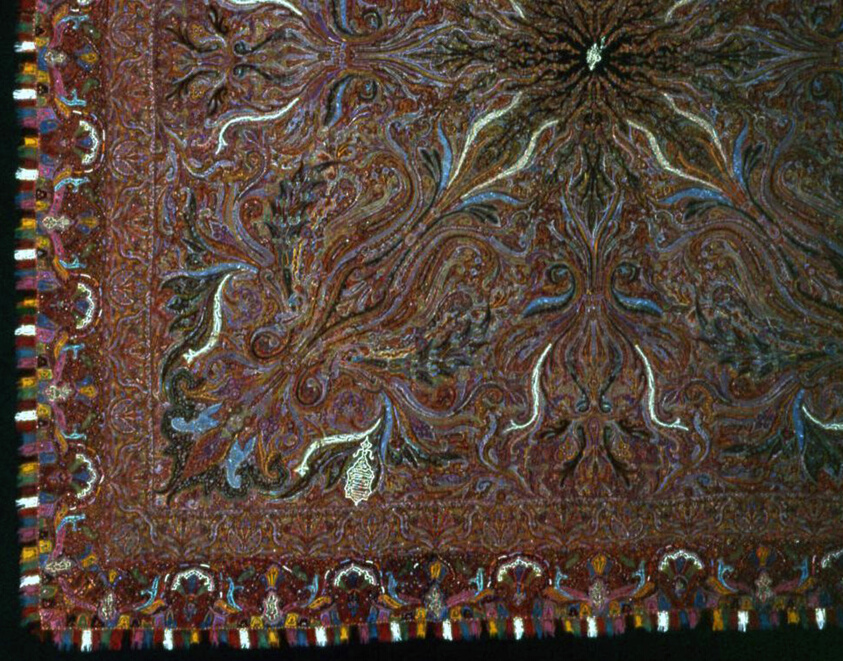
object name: Textile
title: Square Shawl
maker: India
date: 1870s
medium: Wool, patchwork of double interlocking 2:2 'S' twill tapestry weaves; outer border and "Harlequin" tabs of patchwork in 2:2 twill weaves; embroidered in single back and stem stitches; laid work and couching; main warp fringe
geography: India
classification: textile; weaving